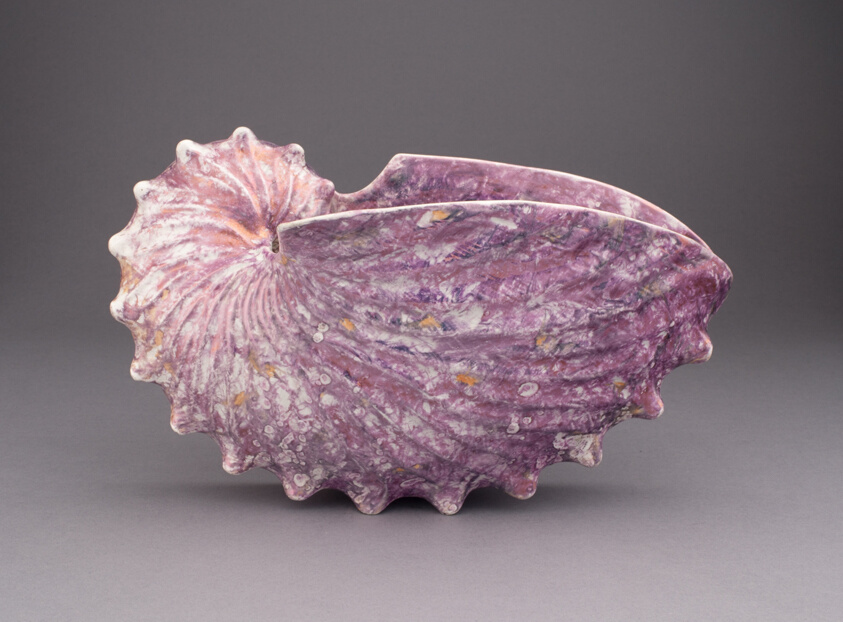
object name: Ceramics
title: Wall Pocket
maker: Wedgwood Manufactory (England, founded 1759)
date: c. 1805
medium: Earthenware with lustre decoration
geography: Staffordshire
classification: lustreware (moonlight luster); earthenware; european decorative arts; ceramics